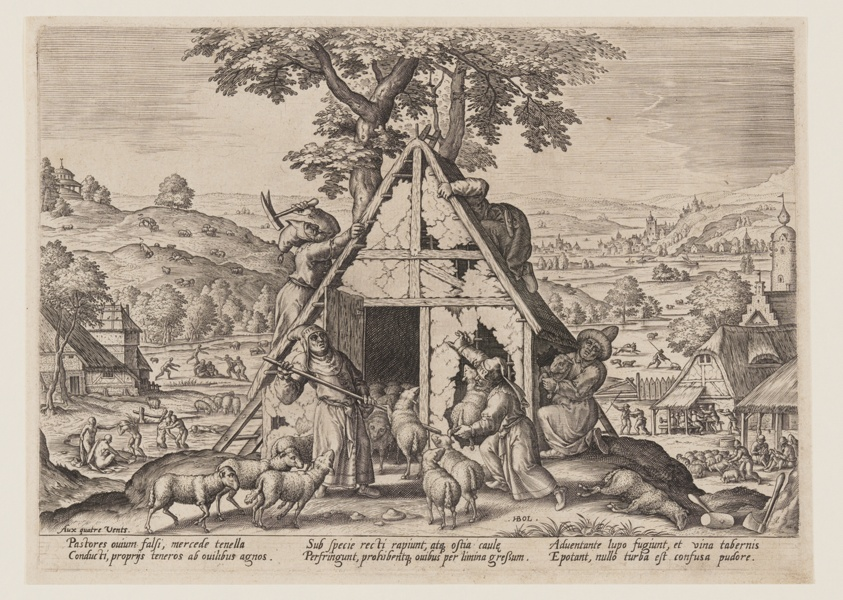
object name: Print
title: The False Shepherd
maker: Jan Sadeler I (Flemish, 1550–1600); after Hans Bol (Flemish, 1534–1593)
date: c. 1575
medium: Engraving on ivory laid paper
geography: Flanders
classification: engraving; paper; print; prints and drawing